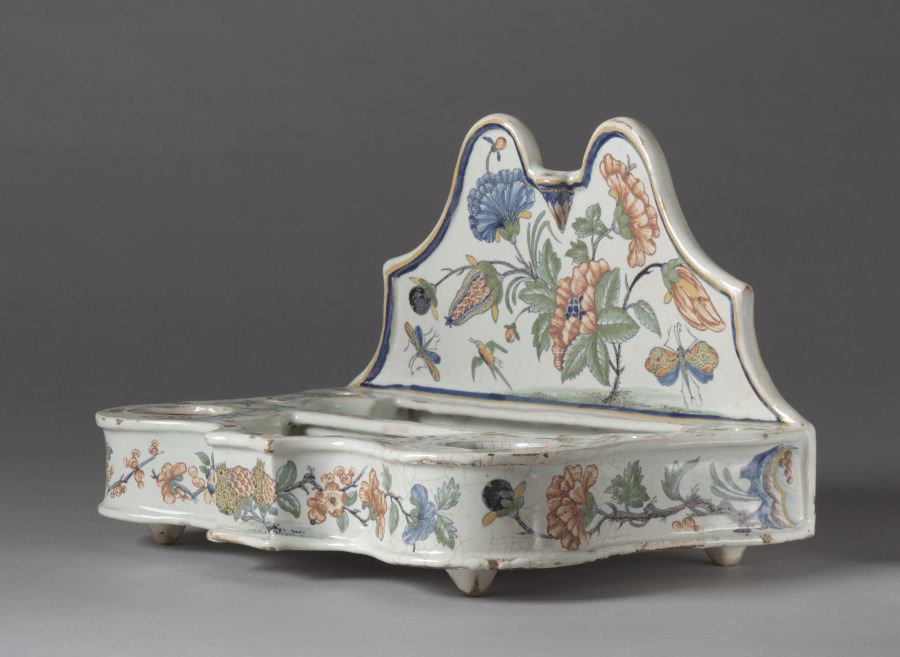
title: Writing Stand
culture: France, Sinceny, 18th century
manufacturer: Sinceny Factory (French)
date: 1746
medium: Tin-glazed earthenware (faience) with enamel decoration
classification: Ceramic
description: The faience factory at Sinceny was an offshoot of that at Rouen. In style, Sinceny closely resembles later Rouen wares with polychrome decoration. The stylized flowers and insects which decorate this writing stand are entirely typical of Sinceny faience.